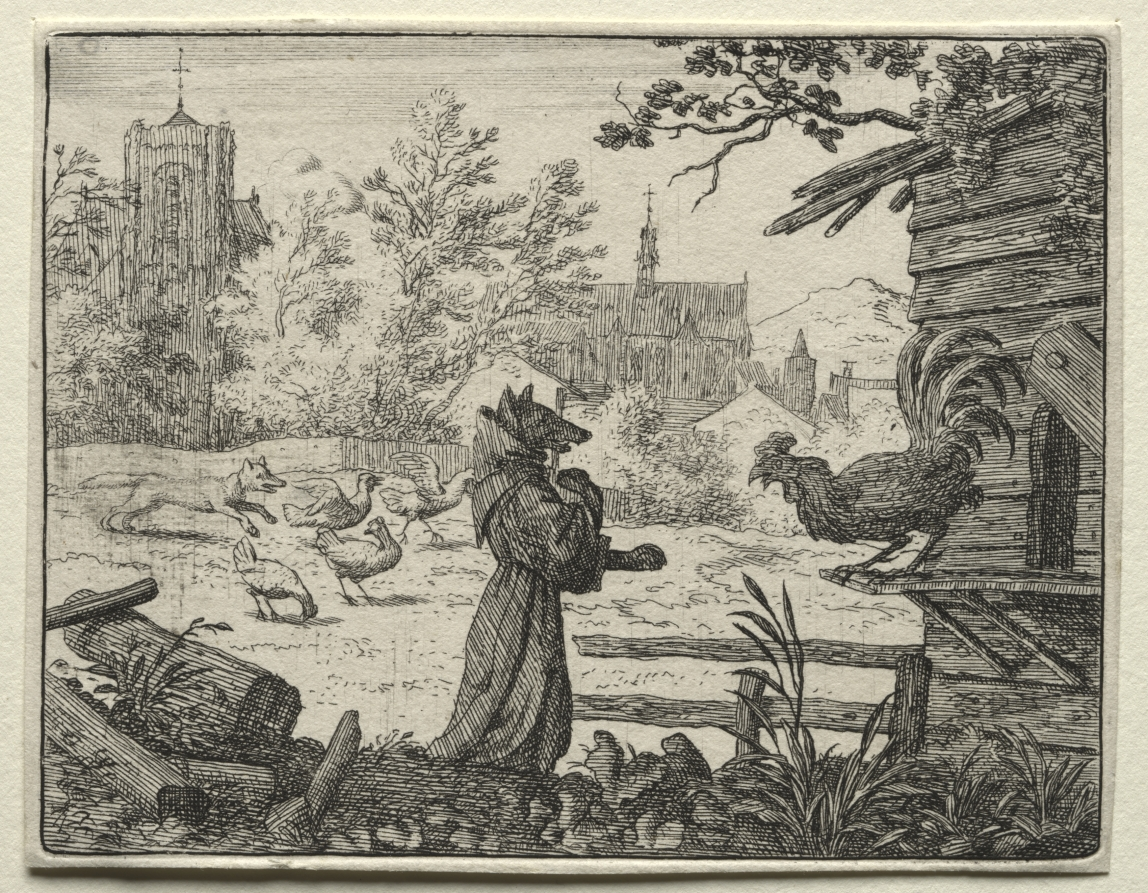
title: Reynard the Fox: Reynard Disguised as a Monk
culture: Netherlands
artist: Allart van Everdingen (Dutch, 1621–1675)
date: 1650–75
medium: etching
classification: Print